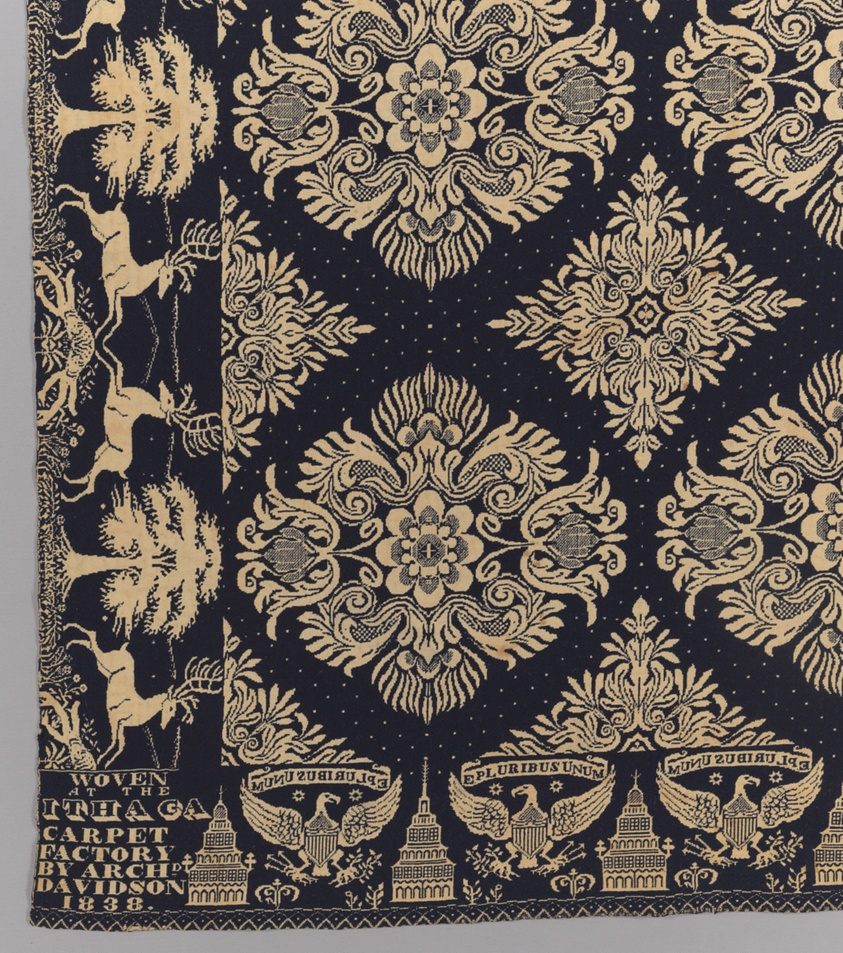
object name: Textile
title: Coverlet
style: 19th century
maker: Archibald Davidson (American, born Scottish, active 1832-1848); United States, New York, Tompkins County, Ithaca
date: 1838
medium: Cotton and wool, plain weave double cloth; woven on loom with Jacquard attachment; two loom widths joined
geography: New York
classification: weaving - coverlet; coverlet; weaving; textile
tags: medallions, arrows, united states of america, animals, dots, buildings, foliage, tulips, flowers, trees, deer, eagles, coverlet